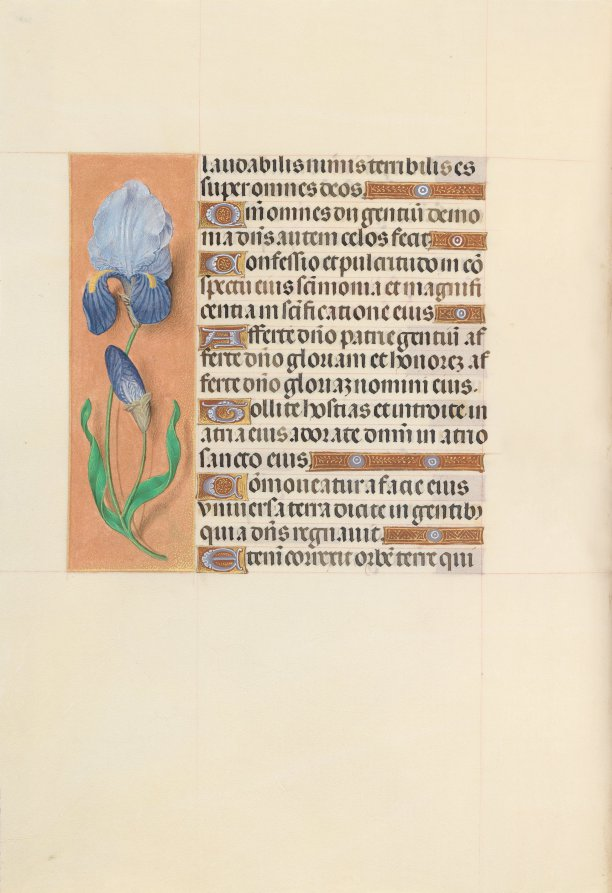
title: Hours of Queen Isabella the Catholic, Queen of Spain: Fol. 107v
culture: Flanders, Ghent and Bruges, late 15th century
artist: Master of the First Prayerbook of Maximillian (Flemish, c. 1444–1519)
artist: and Associates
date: c. 1500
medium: ink, tempera, and gold on vellum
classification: Bound Volume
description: This manuscript was illuminated by a circle of at least five highly organized manuscript painters active in the Flemish cities of Ghent and Bruges. The principal illuminator was Alexander Bening, who painted the majority of the book's miniatures. Manuscripts produced by this circle of artists are renowned for the decoration of their borders, which typically feature a rich variety of realistically-painted flowers, birds, and butterflies. This prayer book, called a book of hours, was intended not for a cleric, but for the private devotions of a lay person-in this case, Isabella the Catholic, Queen of Spain (1451-1504). Isabella's coat of arms embellishes the book's frontispiece. It is unlikely that the book was commissioned by the Queen herself; rather, she probably received it as a diplomatic gift from someone courting her patronage, perhaps Cardinal Francisco Jimenez de Cisneros. A Franciscan friar, Jimenez was dependent upon Isabella for his advancement, first to the post of Queen's confessor in 1492, and then to Archbishop of Toledo in 1495.